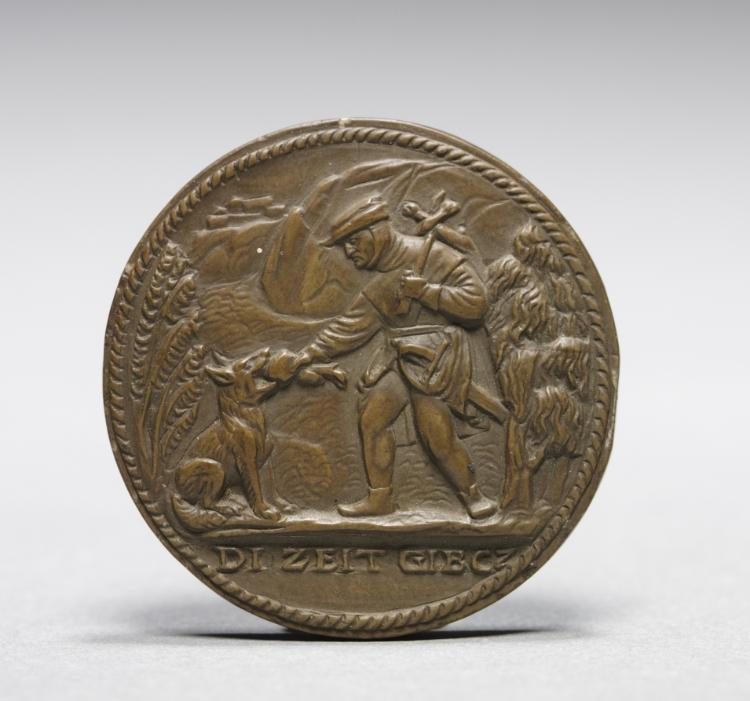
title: Model for the Reverse of the Portrait of Pankraz Labenwolf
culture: Germany, Nuremberg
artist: Ludwig Neufahrer (German, c. 1500–1563)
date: 1542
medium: Kelheim stone (fine-grained limestone)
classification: Sculpture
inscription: inscription: "DI ZEIT GIBCZ" (Time provides).